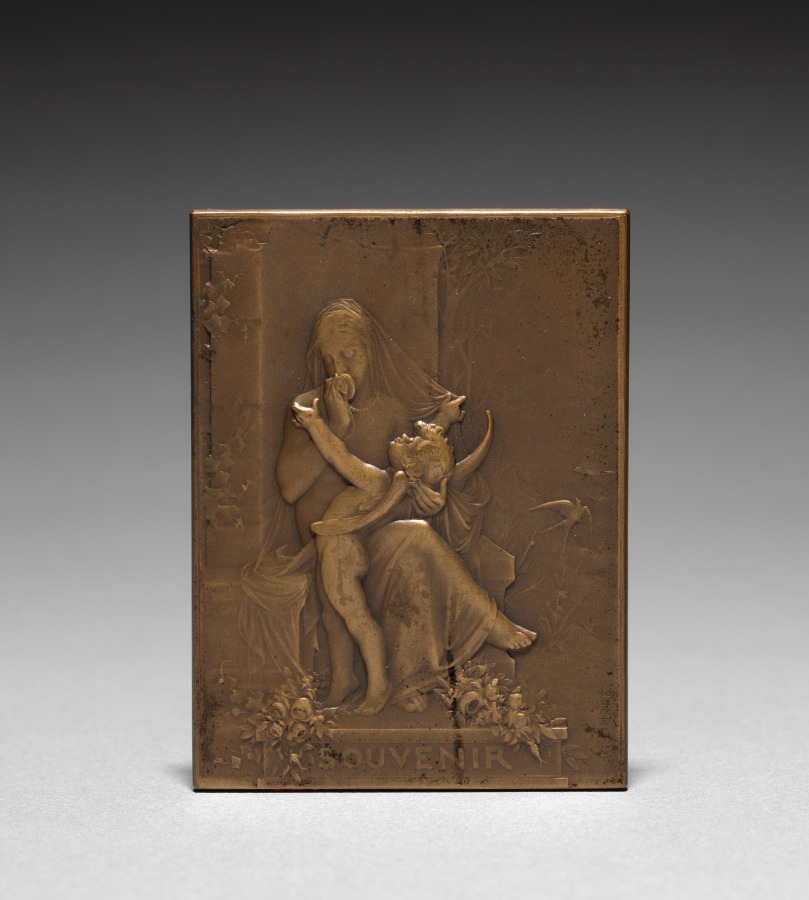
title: Medallion (obverse)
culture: France, 19th-20th century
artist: Jules Dupré (French, 1811–1889)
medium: bronze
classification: Metalwork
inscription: "Souvenir"; signed: "G. Dupré."